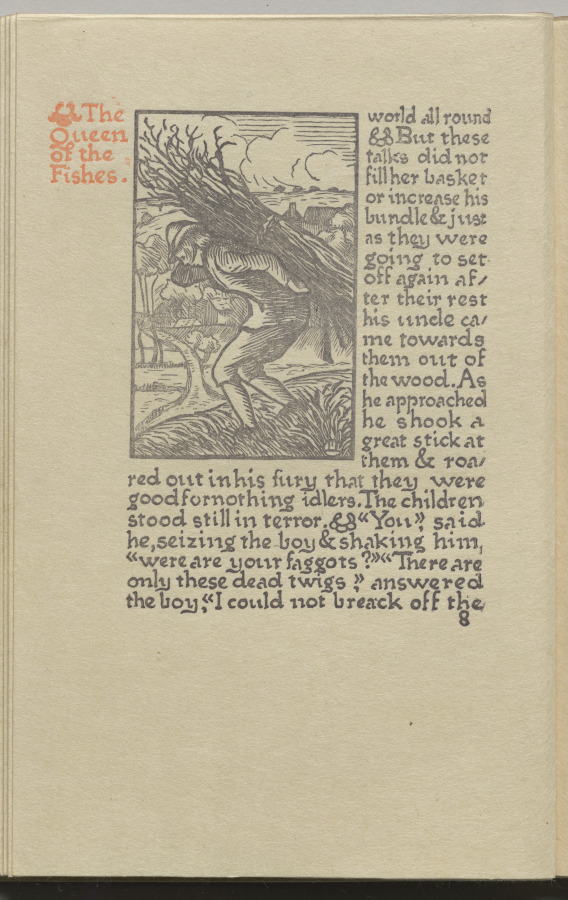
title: The Queen of the Fishes: Plate 8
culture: England, 19th century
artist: Lucien Pissarro (British, 1863–1944)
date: 1894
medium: woodcut printed in gray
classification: Bound Volume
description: Pissarro, son of the French Impressionist artist Camille Pissarro, moved to England in 1890. By 1894 he and his wife, Esther Bensusan Pissarro, had bought a printing press and established the Eragny Press. Influenced by William Morris, they were involved in every step of the production process: designing, cutting the woodblocks, setting type, and printing. The first book published by Ergany Press, The Queen of the Fishes, is based on an old fairy tale in which a peasant boy and girl escape the hardships of their lives by fantasizing that they have been turned into a giant oak and a splendid fish, respectively.